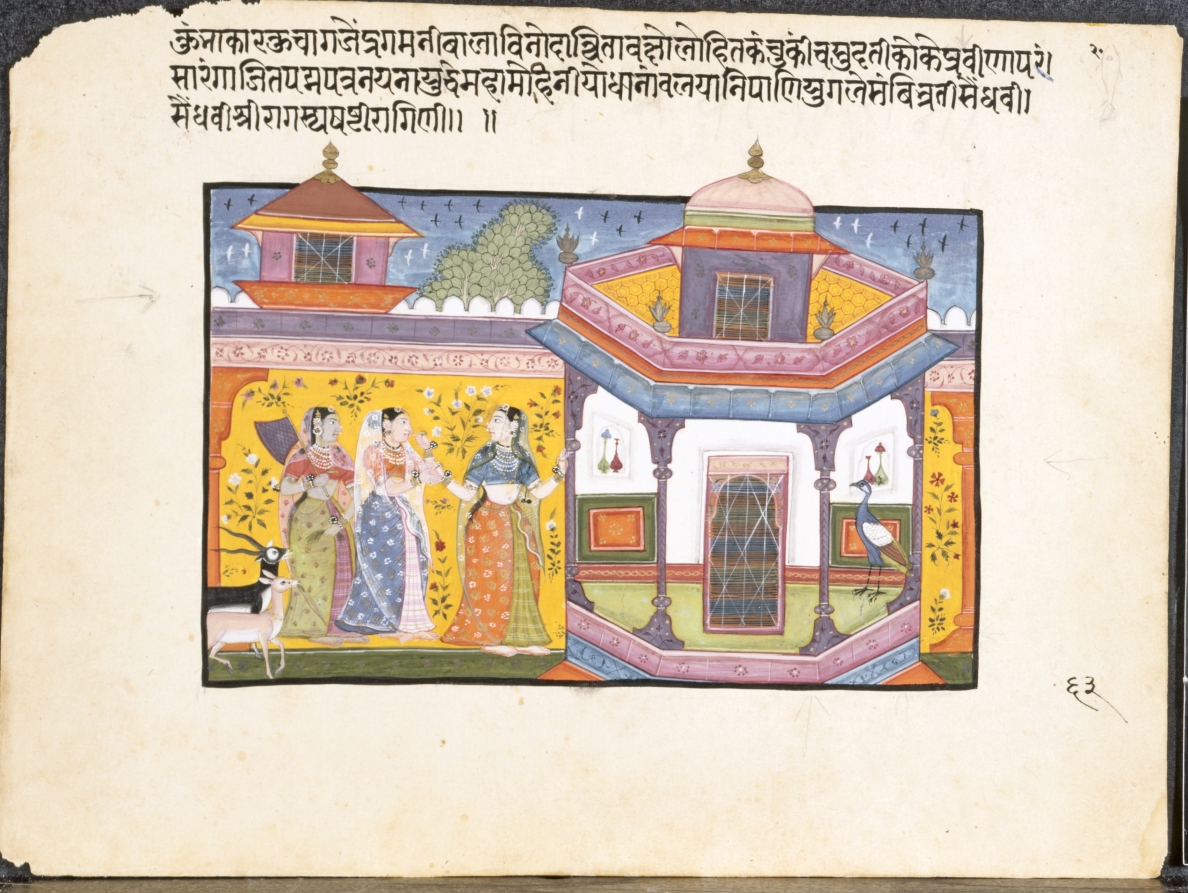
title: Saindhavi Ragini of the "Sri Raga" Family, page from a Ragamala Series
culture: India, Popular Mughal school, 17th century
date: 1600–1610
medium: Gum tempera, ink, and gold on paper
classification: Painting